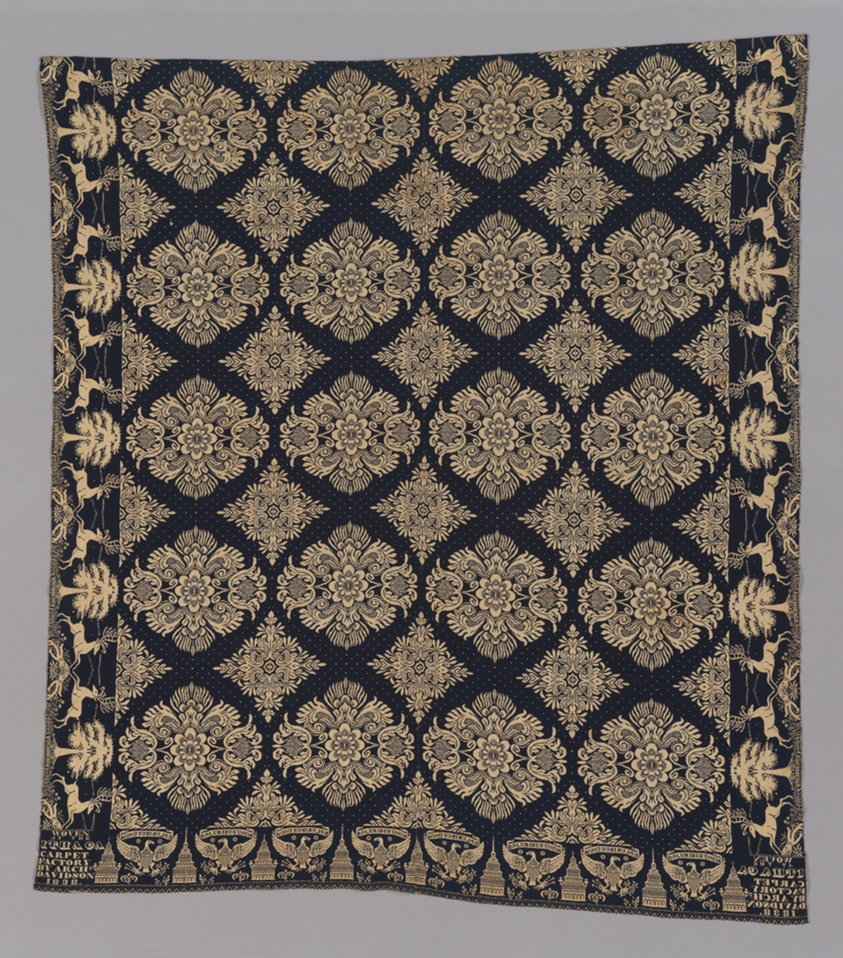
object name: Textile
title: Coverlet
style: 19th century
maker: Archibald Davidson (American, born Scottish, active 1832-1848); United States, New York, Tompkins County, Ithaca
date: 1838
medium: Cotton and wool, plain weave double cloth; woven on loom with Jacquard attachment; two loom widths joined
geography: New York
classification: weaving - coverlet; coverlet; weaving; textile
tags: medallions, arrows, united states of america, animals, dots, buildings, foliage, tulips, flowers, trees, deer, eagles, coverlet